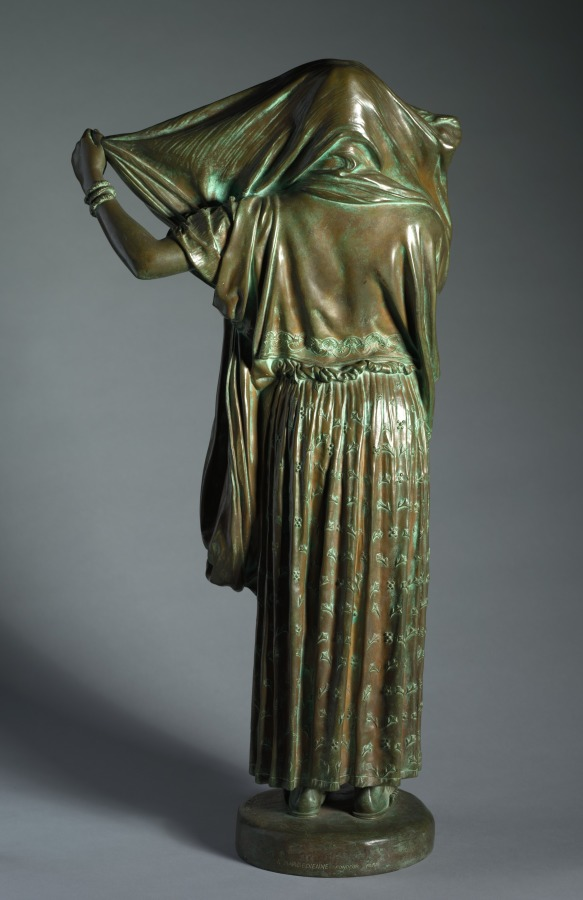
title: Woman with a Veil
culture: France, 19th century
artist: Jean-Léon Gérôme (French, 1824–1904)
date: c. 1891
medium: bronze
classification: Sculpture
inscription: signed upper surface of base: "J L Gerome"; inscribed edge of base at back: "F. Barbedienne, Fondeur, Paris."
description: Many of Gérôme’s best known works reflect the 19th-century European fascination with the Middle East, Asia, and North Africa, which manifested in Orientalist works like this sculpture depicting a woman adjusting her veil. Multiple versions of this sculpture exist, including some with marble and gold additions.